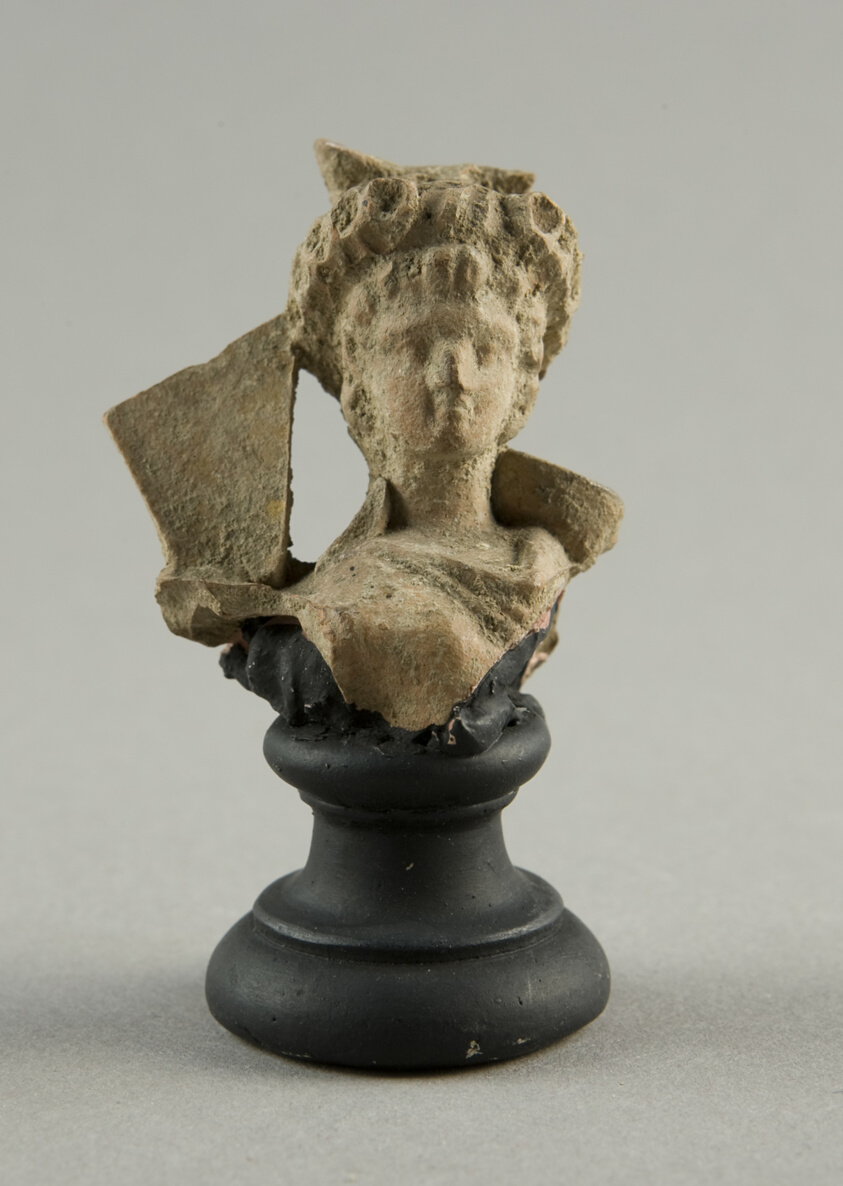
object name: Sculpture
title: Head of a Man or Woman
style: greek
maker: Greek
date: 3rd-1st century BCE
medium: terracotta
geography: Greece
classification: earthenware; ceramics; sculpture; ancient art